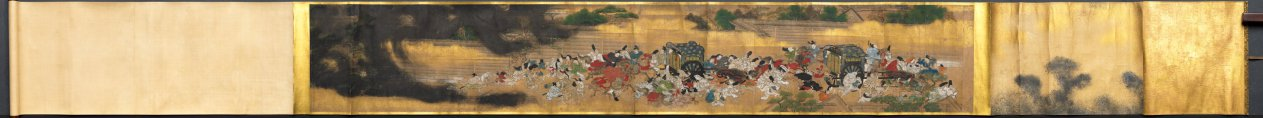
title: People Fleeing from a Fire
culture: Japan, Edo period (1615–1868)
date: 1615–1868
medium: Handscroll; color and gold on paper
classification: Painting